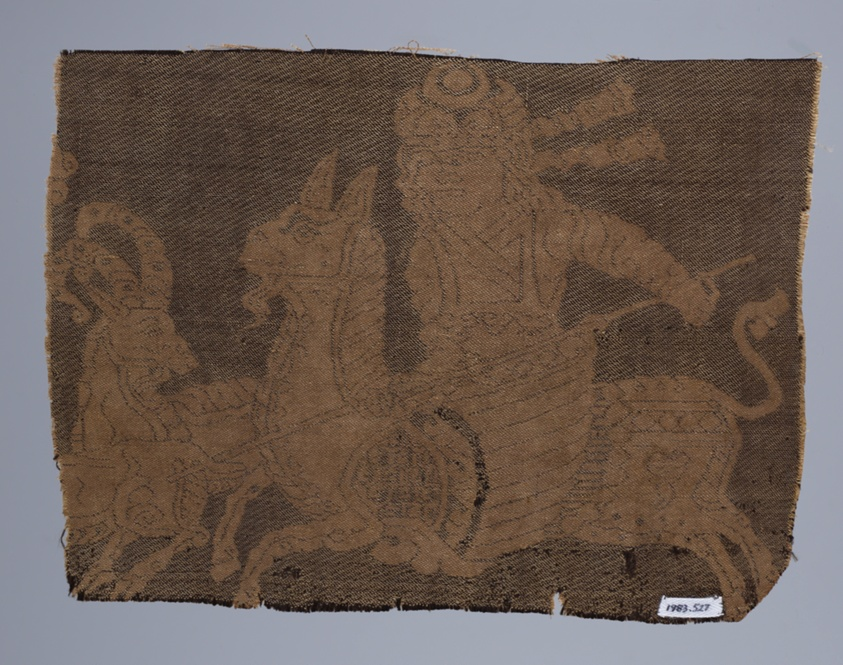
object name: Textile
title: Fragment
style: saveh, seljuk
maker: Iran (Persia, Saveh)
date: 10th/11th century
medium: Silk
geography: Iran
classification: textile; weaving